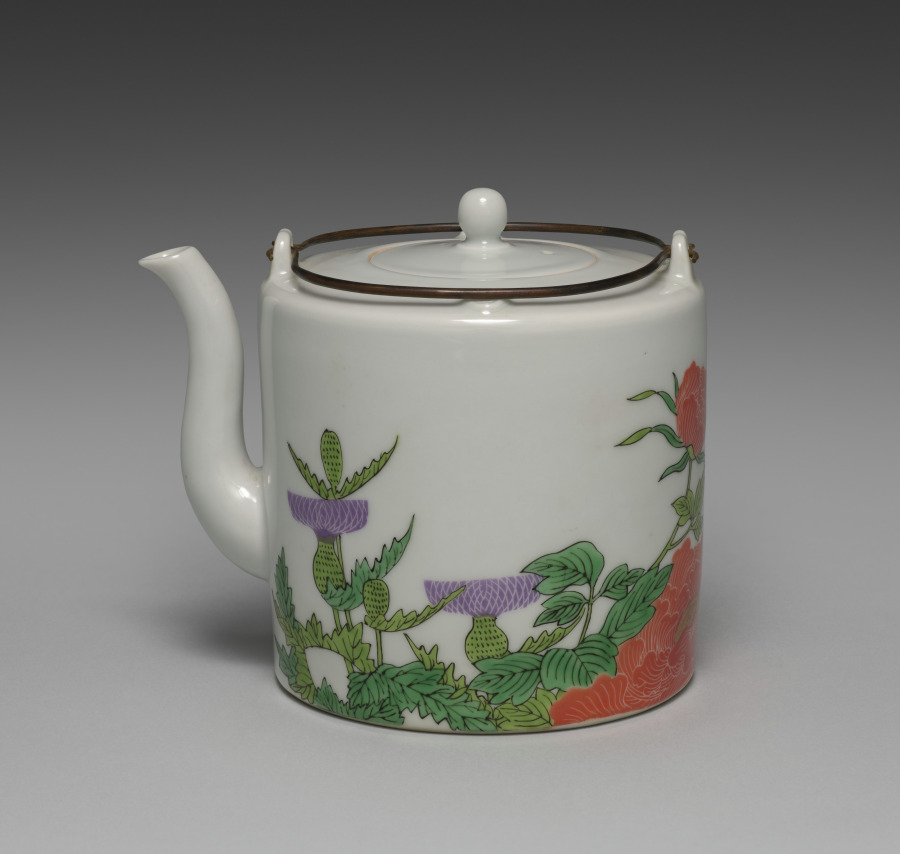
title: Sake Pourer with Flowers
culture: Japan, Meiji period (1868–1912)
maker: Seifū Yohei III (Japanese, 1851–1914)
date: 1893–1914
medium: Porcelain with molded design, overglaze color enamel, and metal handles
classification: Ceramic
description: This sake pourer is of a type called a chōshi. It is elaborately decorated with flowers in overglaze enamels in several colors, including black for the contour lines of leaves and stems; orange, white, gold, and two shades of green for the peonies; and purple for the thistles. The white blossoms have been built up with white enamel, then incised for a white-on-white eect; the orange and purple use an absence of color to produce the contours of individual petals. Yohei III referred to his works in multicolor overglaze enamels as “hundred flower brocades” (hyakka nishiki). Two small nyoi (C. ruyi) staff-head motifs, molded in clay and applied to either side of the lid, create handle rests, as well as natural places for the thumb and index finger of one hand to rest, so one can both secure the lid and steady the pour, while the handles are held in the other hand. The top of a nyoi staff resembles the curled cap of the reishi. Such scepters are imagined to be found in the hands of sages, Daoist immortals, or Buddhist deities and connote lofty goings-on and favorable circumstances. Since this sake pourer is unsigned, it may have been made for imperial family members to give as a gift.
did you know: This sake pourer with purple thistles and orange peonies shows off Seifū Yohei III’s technique of enamels painted over the glaze.